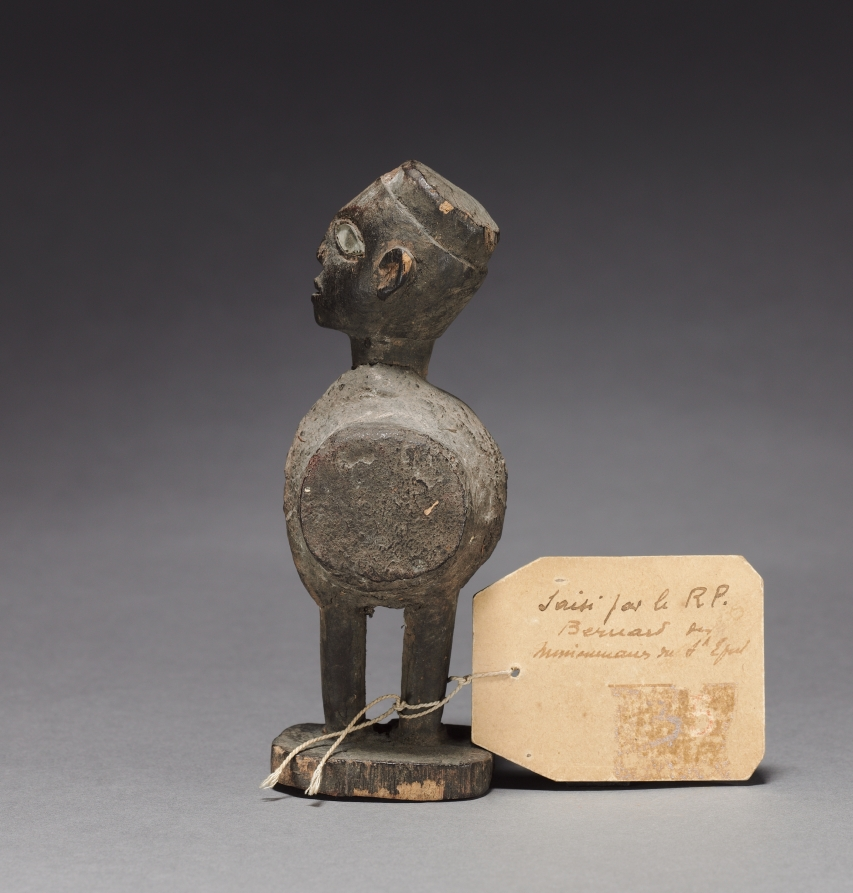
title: Power figure (nkisi)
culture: Africa, Central Africa, Republic of the Congo, Kongo-style maker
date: late 1800s-early 1900s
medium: Wood, organic materials (including resin), and metalized glass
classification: Sculpture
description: One of seven anthropomorphic figurines, these minkisi contained medicines in which an ancestral spirit was believed to reside. The medicines served a metaphorical rather than literal purpose in the resolution of conflicts among Kongo people. This figure contained white- and red-colored medicine loads on its belly and back. Its pose may refer to the nkisi’s capacity to see more than others.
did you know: The nduda minkisi were loaded with gunpowder and/or medicine to protect their owners and to shoot “witches” and other enemies.